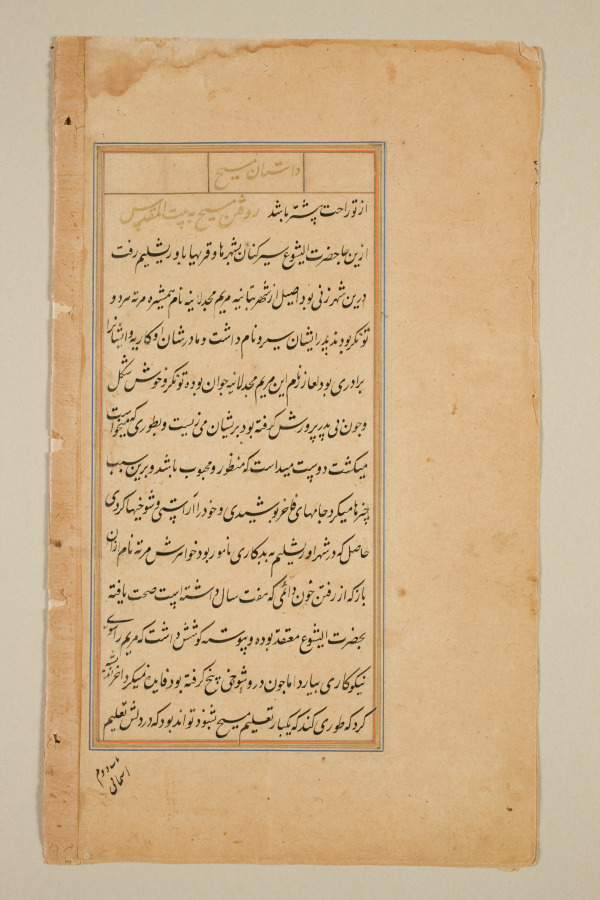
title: Text page from a Mirror of Holiness (Mir’at al-quds) of Father Jerome Xavier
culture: Mughal India, Allahabad, made for Prince Salim (1569–1627)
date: 1602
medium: Ink and gold on paper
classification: Manuscript